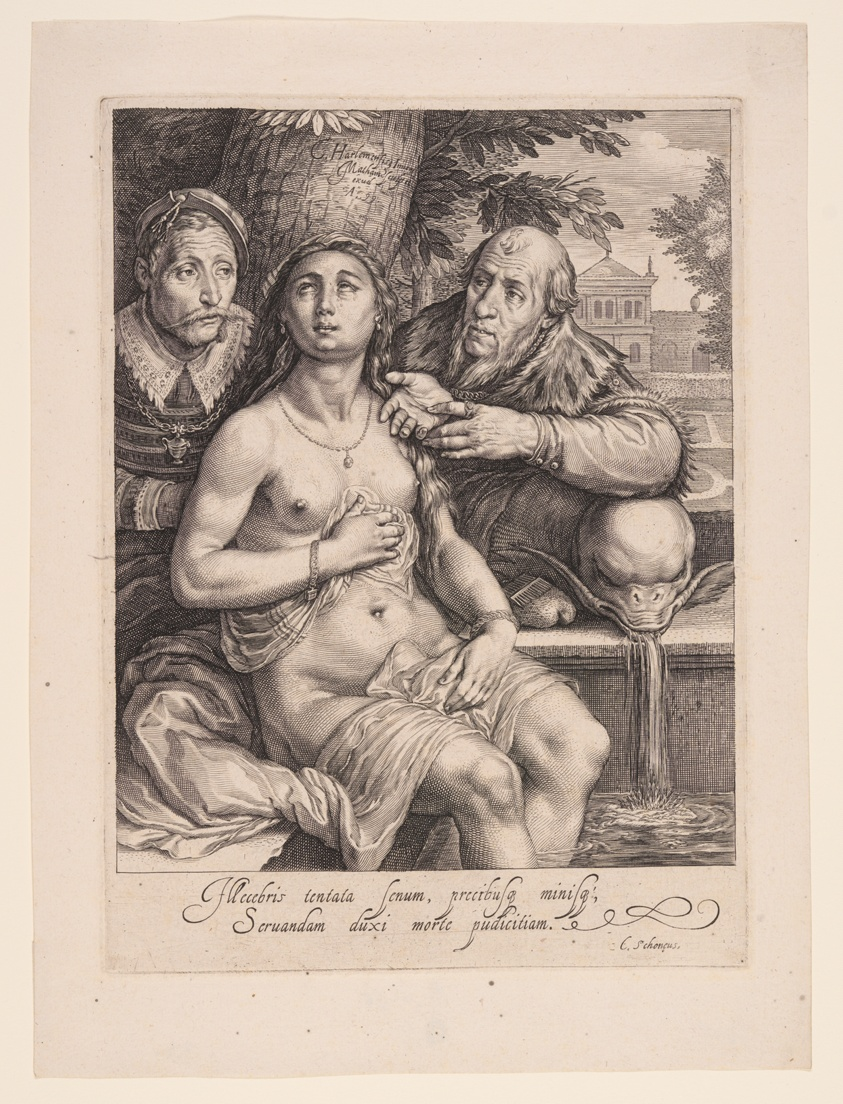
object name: Print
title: Susanna and the Elders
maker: Jacob Matham (Dutch, 1571–1631); after Cornelis van Haarlem (Dutch, 1562-1638)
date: 1599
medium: Engraving on laid paper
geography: Netherlands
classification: print; engraving; paper; prints and drawing